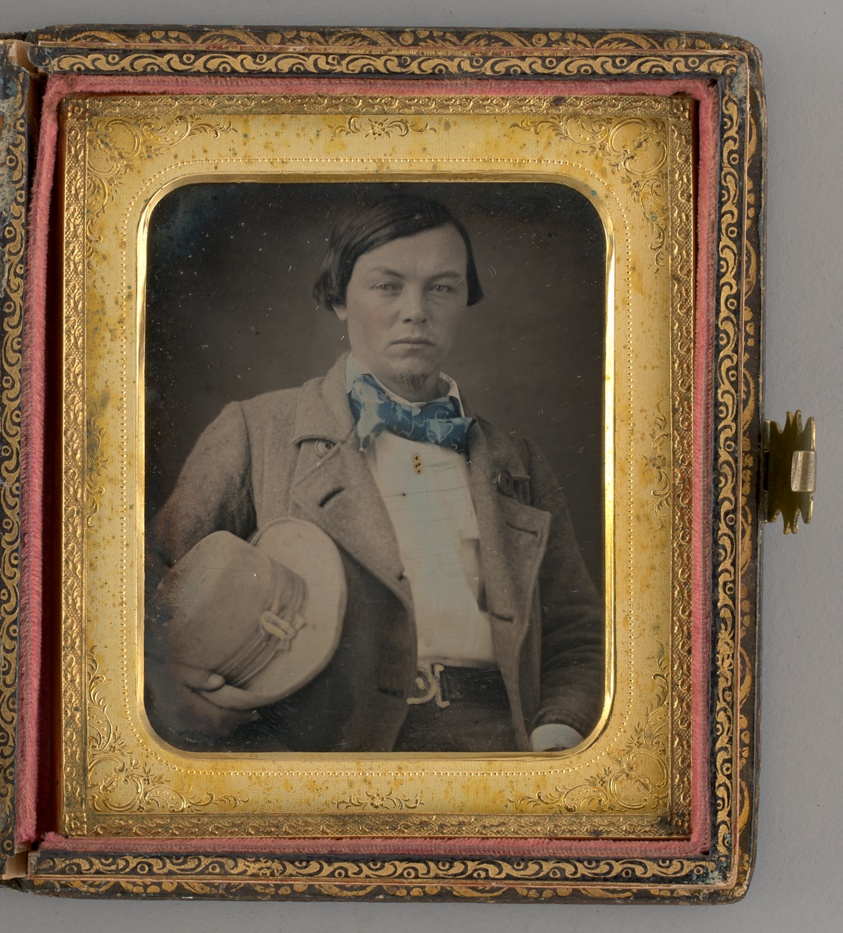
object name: Photograph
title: Untitled (Portrait of a Boy Holding a Hat)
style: 19th century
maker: George Howard Johnson; American, 1823-1879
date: 1854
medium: Daguerreotype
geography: United States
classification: portrait; photograph; photographic process; photography; portrait; daguerreotype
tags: lundberg collection, portraits: male subject, portrait, Male, boys, hats, portraits